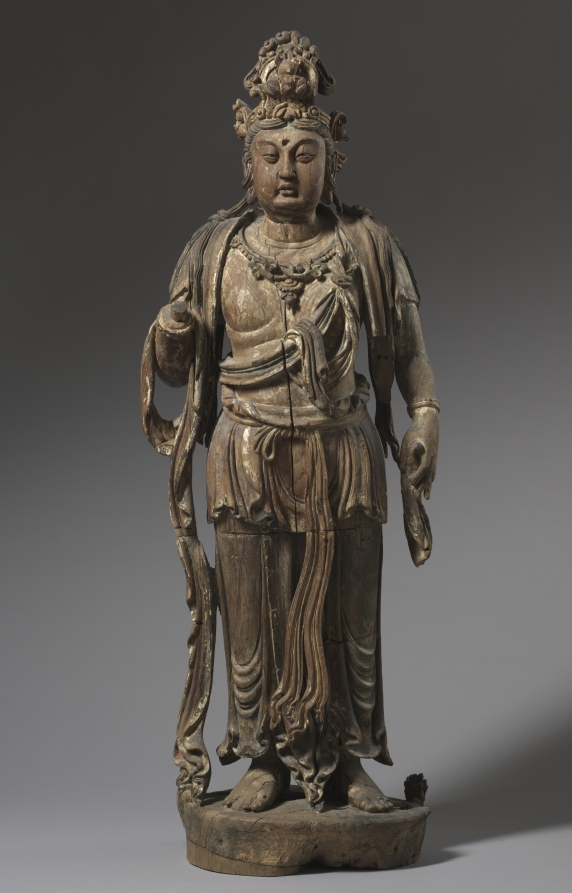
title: Standing Bodhisattva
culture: China, Jin dynasty (1115-1234)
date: 1200s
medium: wood with traces of polychromy and gold leaf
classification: Sculpture